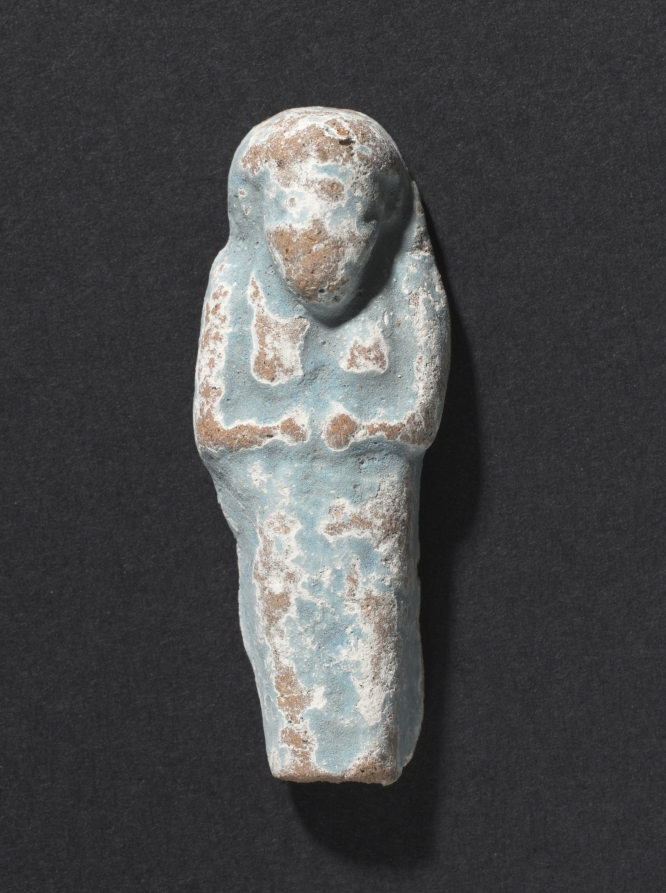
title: Shawabty of Ditamenpaankh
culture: Egypt, Late period (715–332 BCE), Dynasty 25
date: 715–656 BCE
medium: terracotta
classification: Funerary Equipment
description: High demand for shawabtys in the Late Period, a time when as many as 400 or more shawabtys were placed in the tomb with the deceased, gave rise to a specialized container for storing them: the shawabty box. This example is inscribed for the lady of the house, Ditamenpaankh, and was probably one of a pair originally made for her. The single-masted boat on the box's lid is perhaps an allusion to the pilgrimage of the deceased to the holy city of Abydos, the cult city of Osiris, king of the dead. The shawabtys inside are crude, mass-produced examples cast in an open mold. Made of terracotta, their blue paint imitates more costly shawabtys made of faience. As for the shawabty spell, it has been removed from its traditional location on the shawabty's front and relocated onto the sides of box, where it needed only to be written once, thus expediting production.